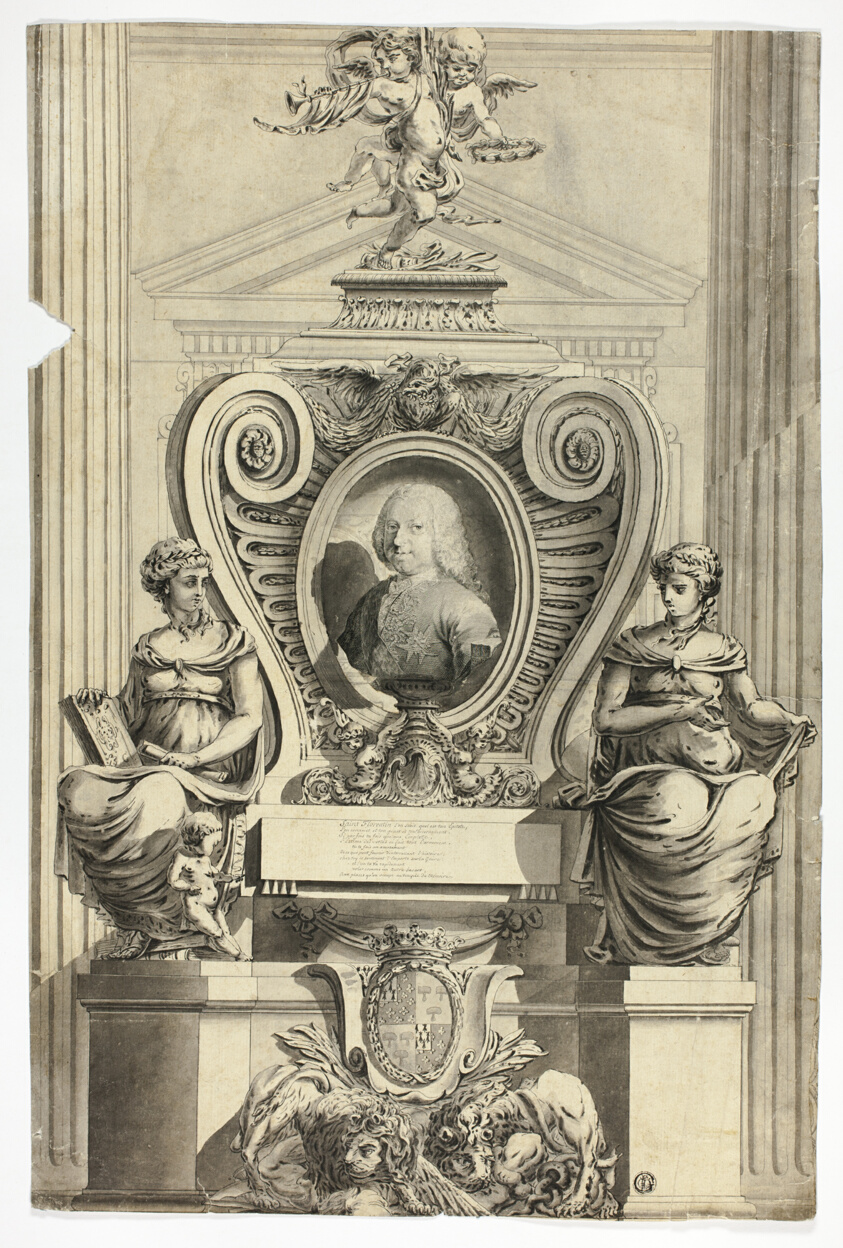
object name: Drawing and Watercolor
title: Tomb of Marquis Saint-Florentin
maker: Unknown Artist; French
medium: Pen and black ink, with brush and black and gray wash, with cut-out engraving, pieced on cream laid paper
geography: France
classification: ink or chalk wash; drawings (visual works); prints and drawing